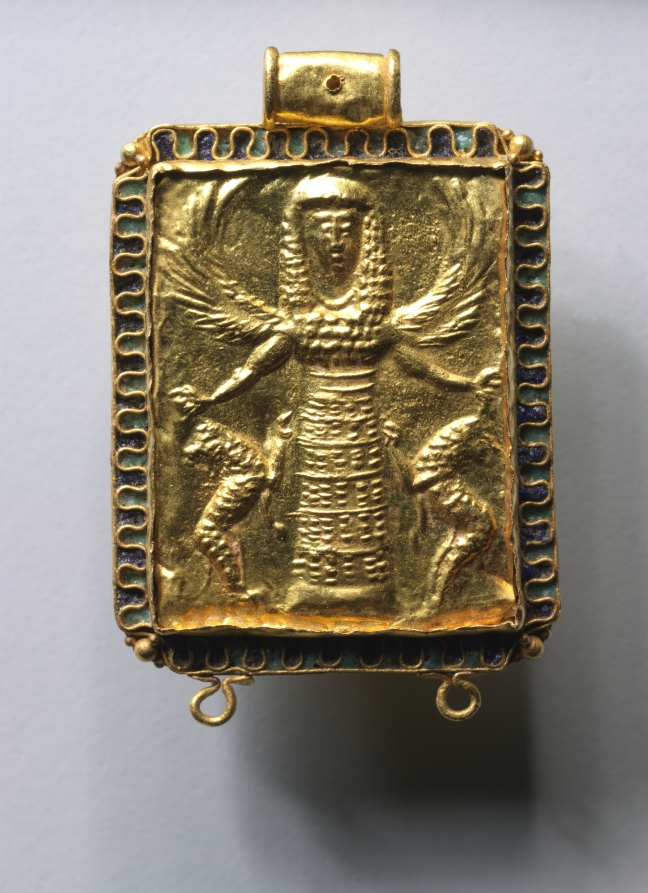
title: Daedalic Pendant with Potnia Theron (Mistress of the Animals)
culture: Eastern Greece, Rhodian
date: 650–600 BCE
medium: gold and glass-like substance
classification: Metalwork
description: This pendant, received in 2001 (2001.157), was probably originally from the same necklace as the nearly identical pendant acquired by the museum in 1999 (1999.88). Both depict the goddess Potnia Theron, the “mistress of the animals,” a deity sometimes associated with the Greek goddess Artemis. The goddess stands in a frontal pose with upswept wings, one curving above each shoulder. A feline rears up on either side of her, pulled by a leash held in each of her clenched fists.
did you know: The central decoration was likely made by burnishing a sheet of gold on a wood, stone, or ceramic form.